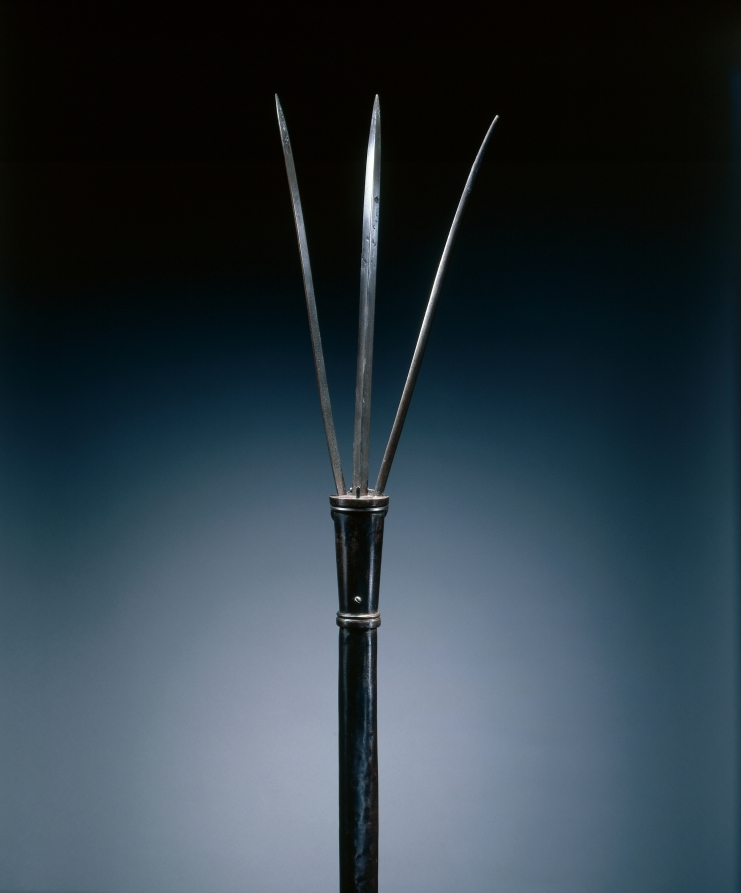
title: Brandistock (with retractible blades)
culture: Italy, early 17th century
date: c. 1600–25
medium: steel; round wood haft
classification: Arms and Armor